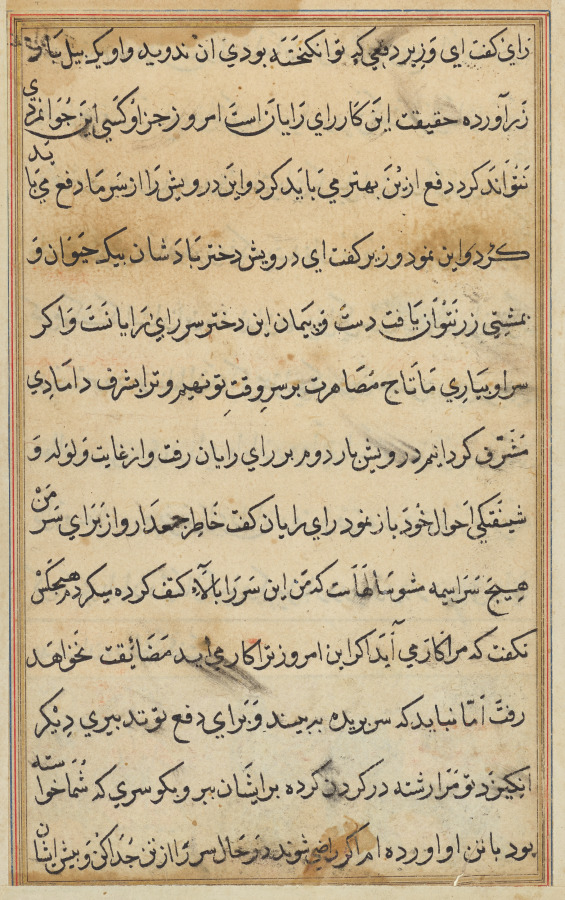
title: Page from Tales of a Parrot (Tuti-nama): text page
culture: Mughal India, court of Akbar (reigned 1556–1605)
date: c. 1560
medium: gum tempera, ink, and gold on paper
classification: Painting